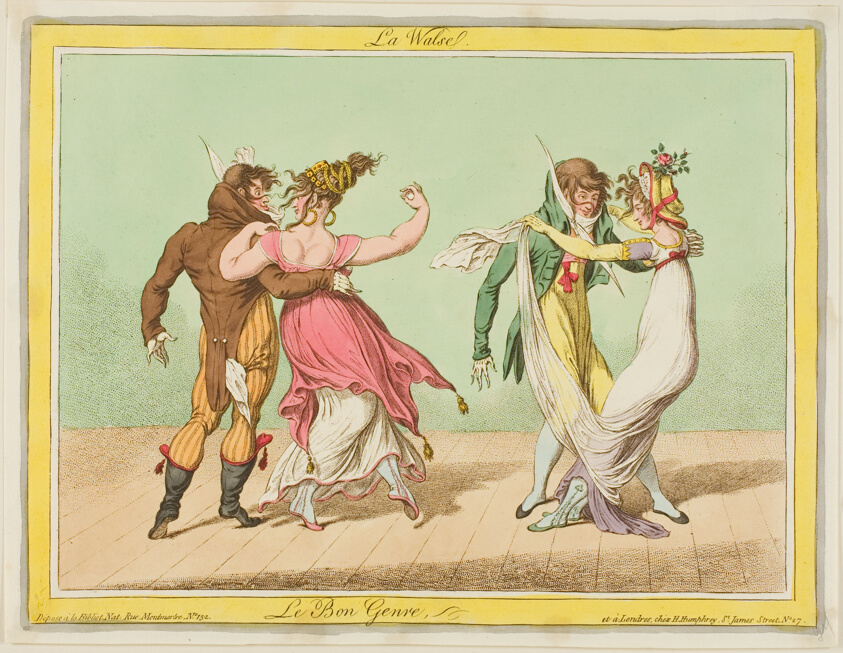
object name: Print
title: La Walse, from Le Bon Genre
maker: Unkown French Artist; published by Hannah Humphrey (English, died 1818 or 1822)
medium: Hand-colored engraving on cream wove paper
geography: France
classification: engraving; print; prints and drawing